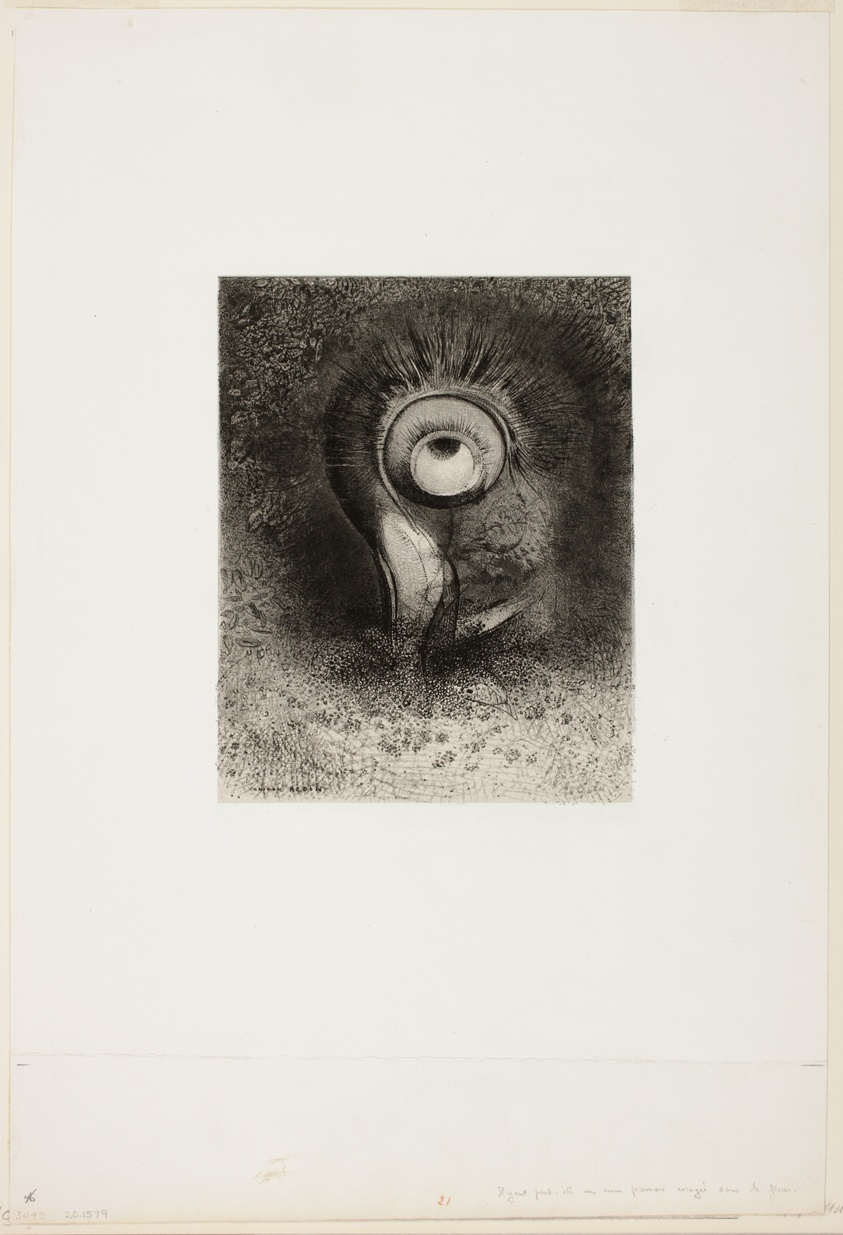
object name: Print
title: There Was Perhaps a First Vision Attempted in the Flower, plate 2 of 8 from "Les Origines"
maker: Odilon Redon (French, 1840-1916)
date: 1883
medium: Lithograph in black on light gray chine laid down on white wove paper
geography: France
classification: lithograph; print; prints and drawing; paper